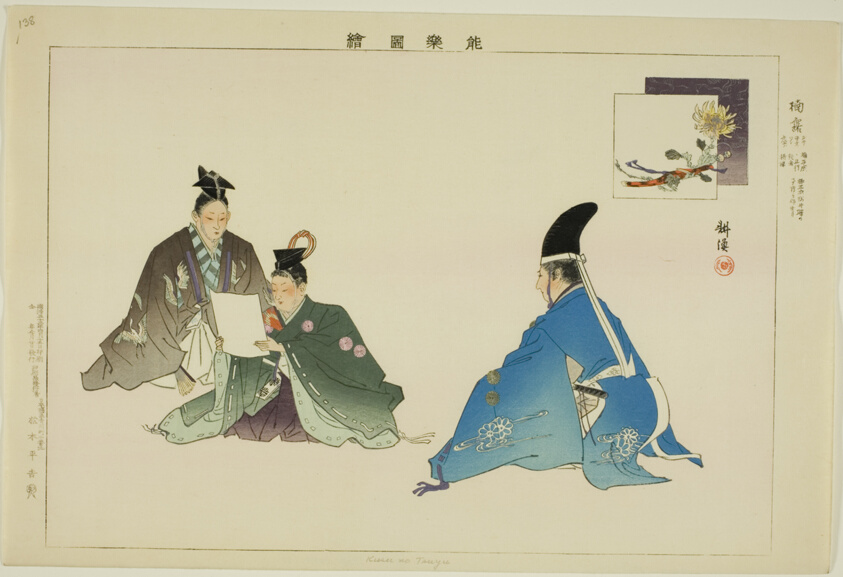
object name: Print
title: Kusu no Tsuyu, from the series "Pictures of No Performances (Nogaku Zue)"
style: Japanese (culture or style)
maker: Tsukioka Kogyo; Japanese, 1869-1927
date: 1898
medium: Color woodblock print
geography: Japan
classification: woodblock print; print; asian art